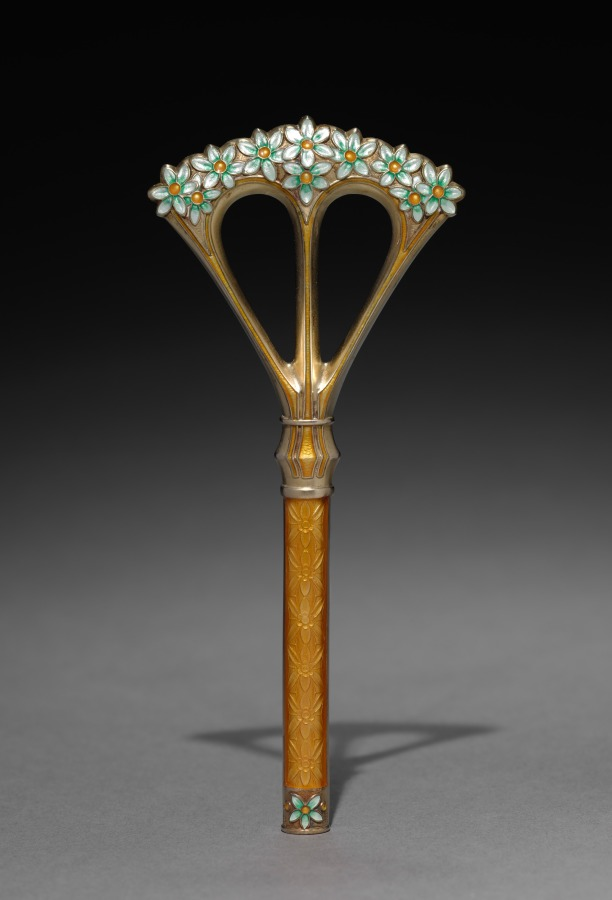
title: Parasol Handle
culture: Norway, Oslo, early 20th Century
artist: firm of Jacob Tostrup (Norwegian, 1806–1890)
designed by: possibly by Torolf Prytz (Norwegian)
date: c. 1900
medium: silver and enamel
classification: Enamel